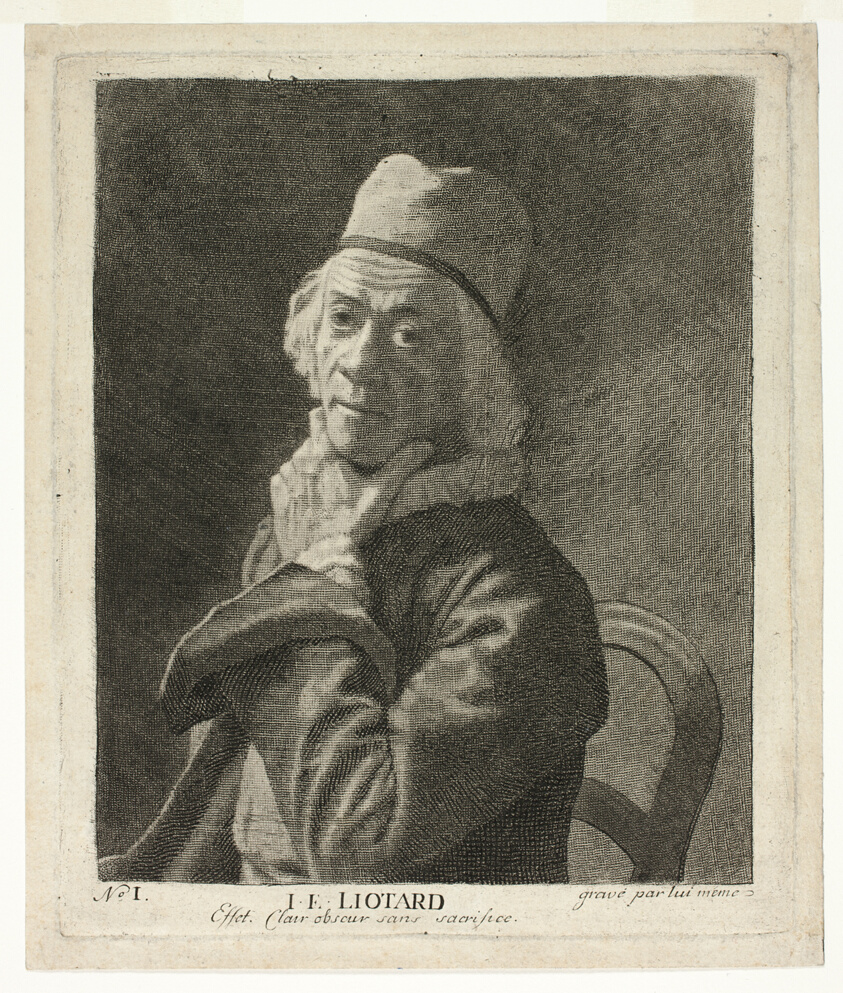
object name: Print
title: The Small Self-Portrait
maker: Jean-Étienne Liotard; Swiss, 1702-1789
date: c. 1778-81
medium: Roulette and engraving over mezzotint on ivory laid paper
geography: Switzerland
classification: etching; print; prints and drawing